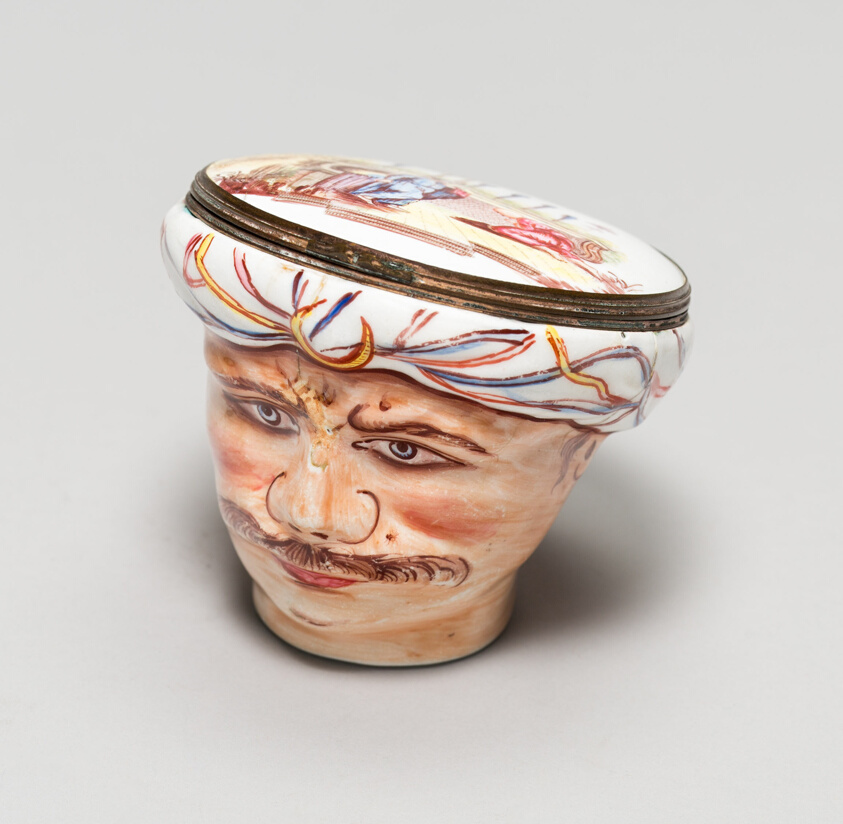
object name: Metalwork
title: Bonbonnière: Head of a Turk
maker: Birmingham, England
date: c. 1765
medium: Polychrome enamel on copper with metal mounts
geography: England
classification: enamel; metalwork